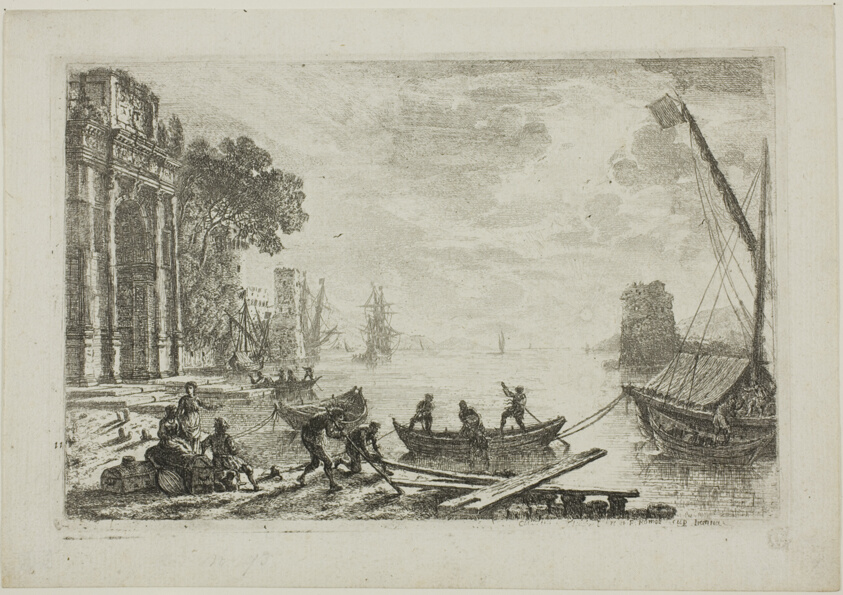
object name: Print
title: Harbor Scene with Rising Sun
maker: Claude Lorrain (French, 1600-1682)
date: 1634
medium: Etching on ivory laid paper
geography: France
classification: etching; print; prints and drawing